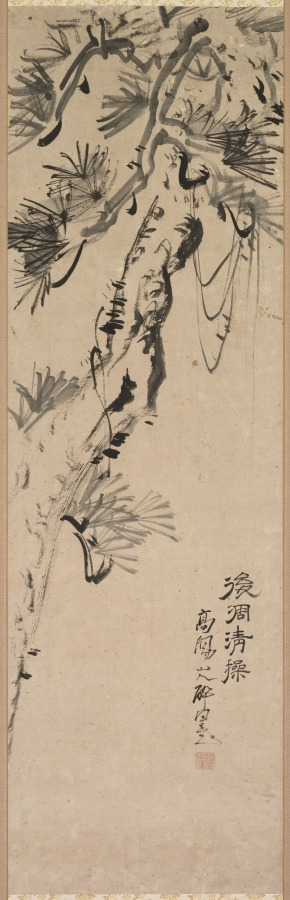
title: Aged Pine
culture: Japan, Edo period (1615–1868)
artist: Nakayama Kōyō (Japanese, 1717–1780)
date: 1717–80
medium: hanging scroll; ink on paper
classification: Painting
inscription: Artist's inscription and seal, lower right.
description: The ancient pine is an admired subject in Asian painting and symbolizes the desirable human qualities of wisdom and solid moral character.